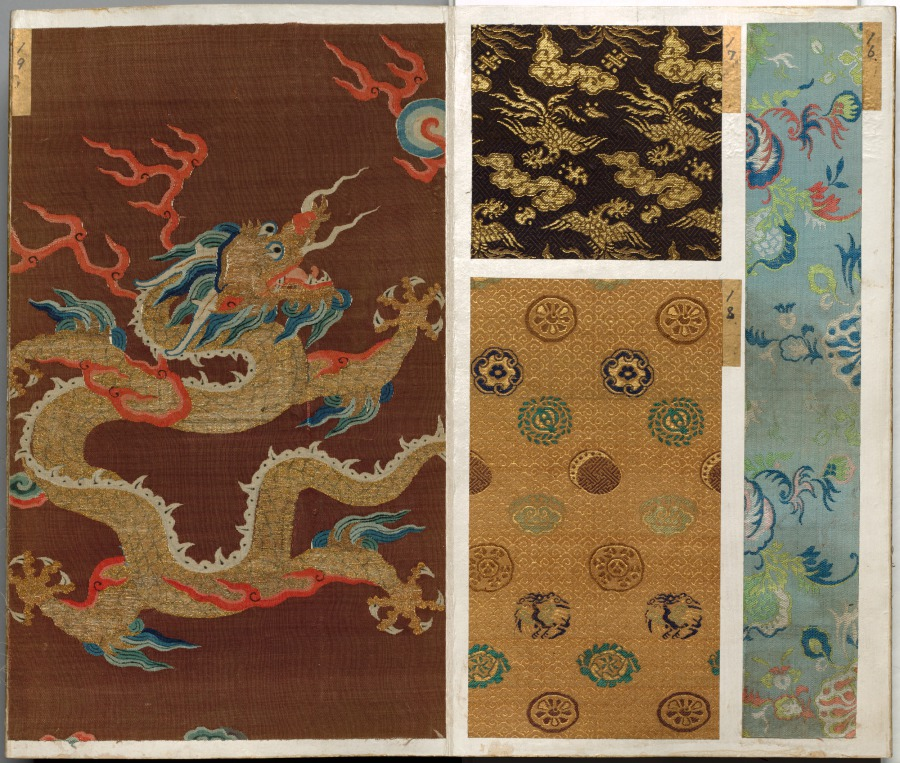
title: Album of Textile Samples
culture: Japan, Edo period (1615–1868)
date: 1600s-1700s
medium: silk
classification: Textile